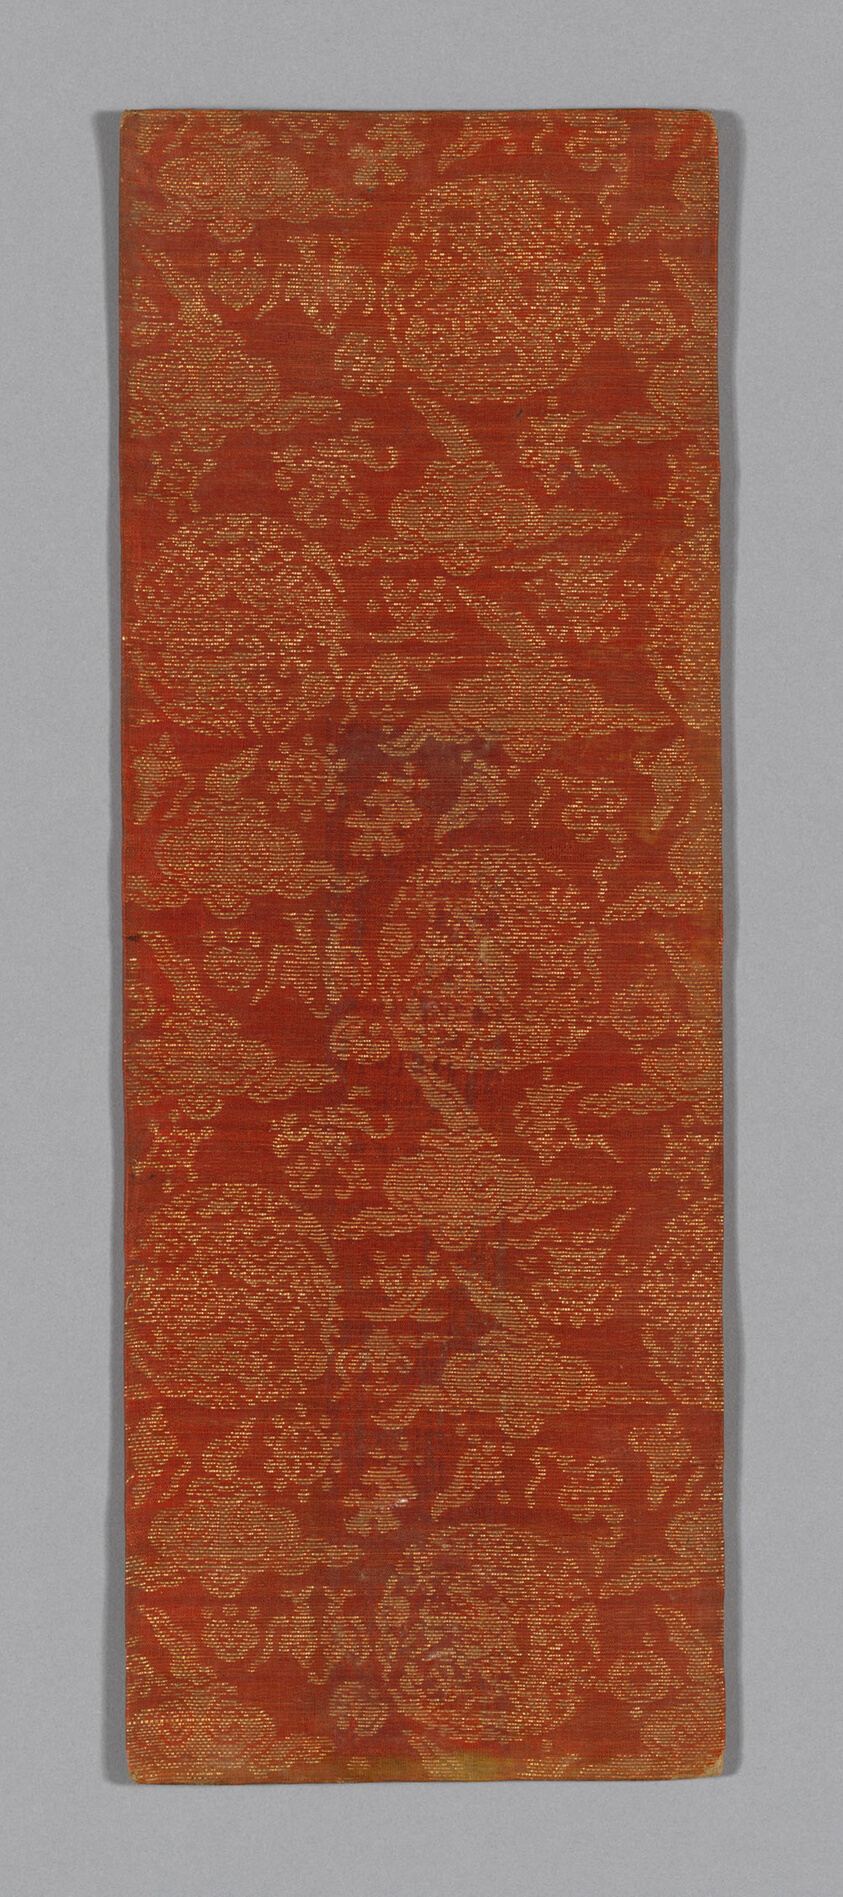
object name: Textile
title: Sutra Cover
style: ming, Chinese (culture or style), East Asian, asian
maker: China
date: Ming dynasty (1368–1644), c. 1590's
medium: Silk and gold-leaf-over-lacquered-paper strips, plain weave with supplementary patterning wefts bound in plain interlacings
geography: China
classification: textile; weaving